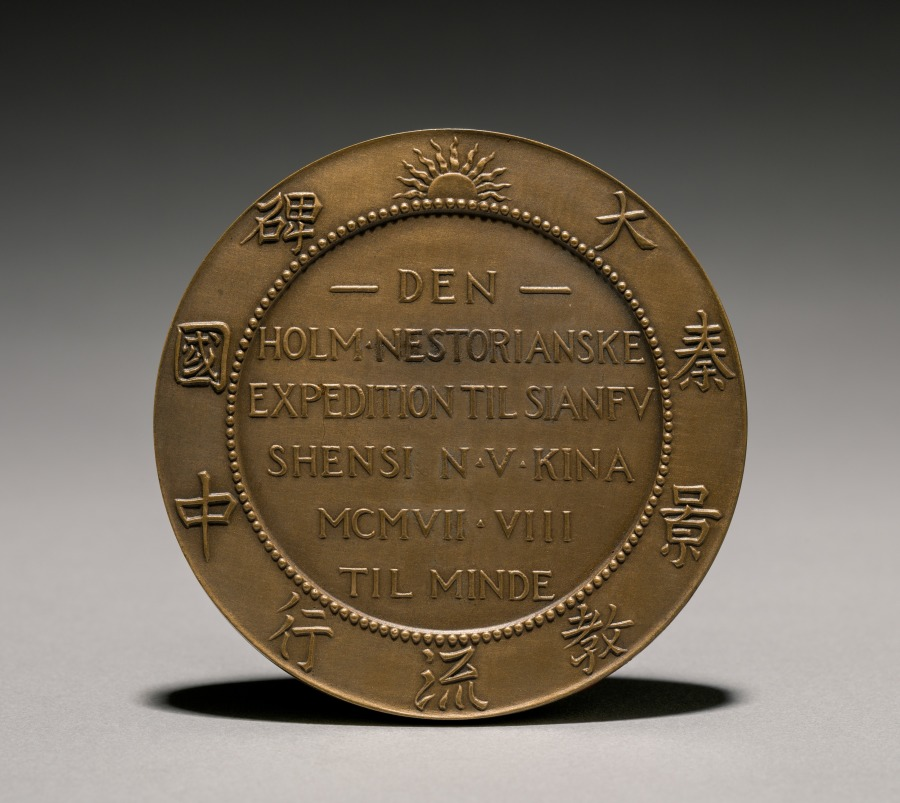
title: Medal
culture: England, 20th century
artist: Albert Bruce-Joy (British, 1842–1924)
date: 1921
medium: bronze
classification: Metalwork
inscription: Obverse: "FRITS HOLM ALBERT BRVCE.JOY FECIT MCMXXI." Reverse: "Den Holm Nestorianske expedition til Sian-fu Shensi N. V. Kina, MCMVII.VIII til Minde."